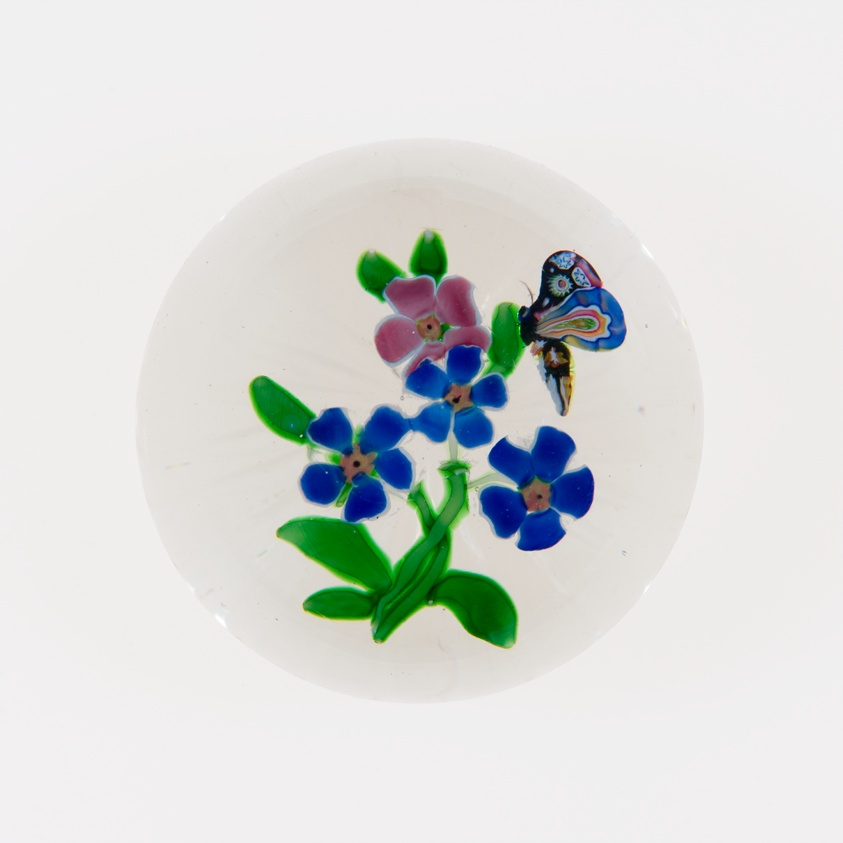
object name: Glass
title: Paperweight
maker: Saint-Louis Glassworks (Cristalleries de Saint-Louis); Lorraine, France, founded 1586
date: c. 1848/55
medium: Glass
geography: Saint-Louis-lès-Bitche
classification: paperweight; glass